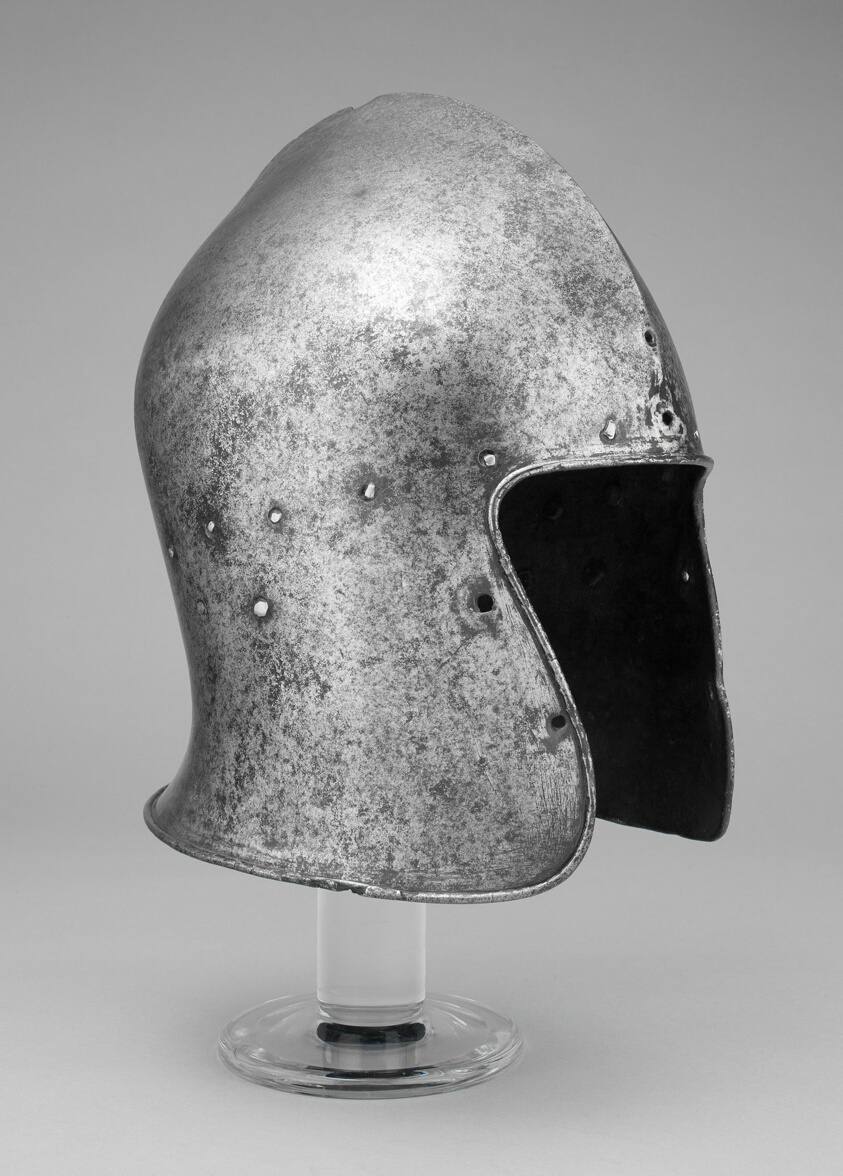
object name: Armor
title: Sallet (Barbute)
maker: Antonio Missaglia (Italian, 1416/17-1495/96); Milan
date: 1460/70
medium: Steel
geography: Milan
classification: suit-helmet; armor; arms and armor